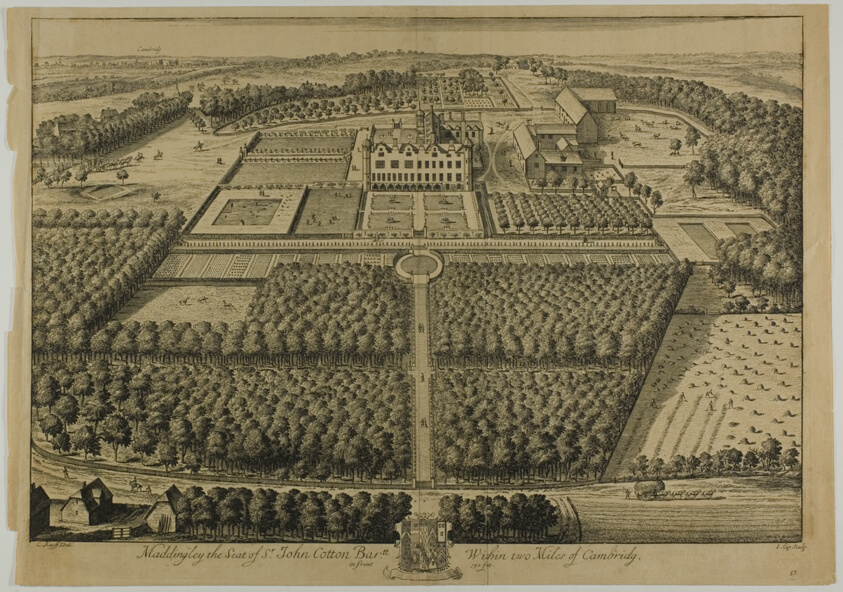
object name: Print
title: Maddingley, plate 57 from Britannia Illustrata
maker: Jan Kip (Dutch, c. 1653-1722); after Leonard Knyff (Dutch, 1650-1721); published by David Mortier (French, 1673-1728)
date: published 1707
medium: Etching, with engraving, in black on cream laid paper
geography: Netherlands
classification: prints and drawing; engraving; etching; print